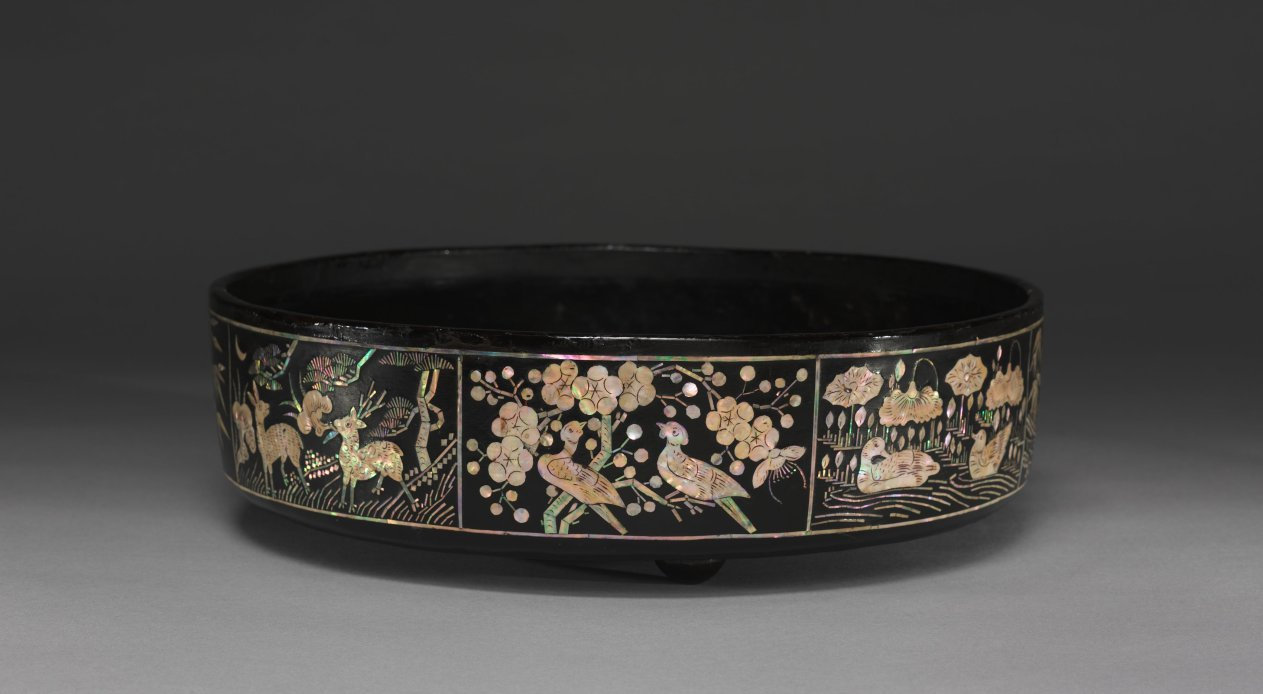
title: Tray for Sewing Tools with Mother-of-Pearl Inlay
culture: Korea, Joseon dynasty (1392–1910)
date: 1800s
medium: lacquer with mother-of-pearl inlay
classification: Lacquer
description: This mother-of-pearl lacquer tray is decorated with various scenes of animals interacting with their natural surroundings. Its flat circular base depicts a pond where a leaping carp and a small school of fish swim below the boughs of a cherry tree. The tray’s exterior wall is densely decorated with various animals paired with plants symbolizing wishful thoughts of longevity, marital happiness, and prosperity.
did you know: Many thin layers of lacquer were applied to the tray's leather core. The design was cut into the dry lacquer and then the mother-of-pearl was inserted.